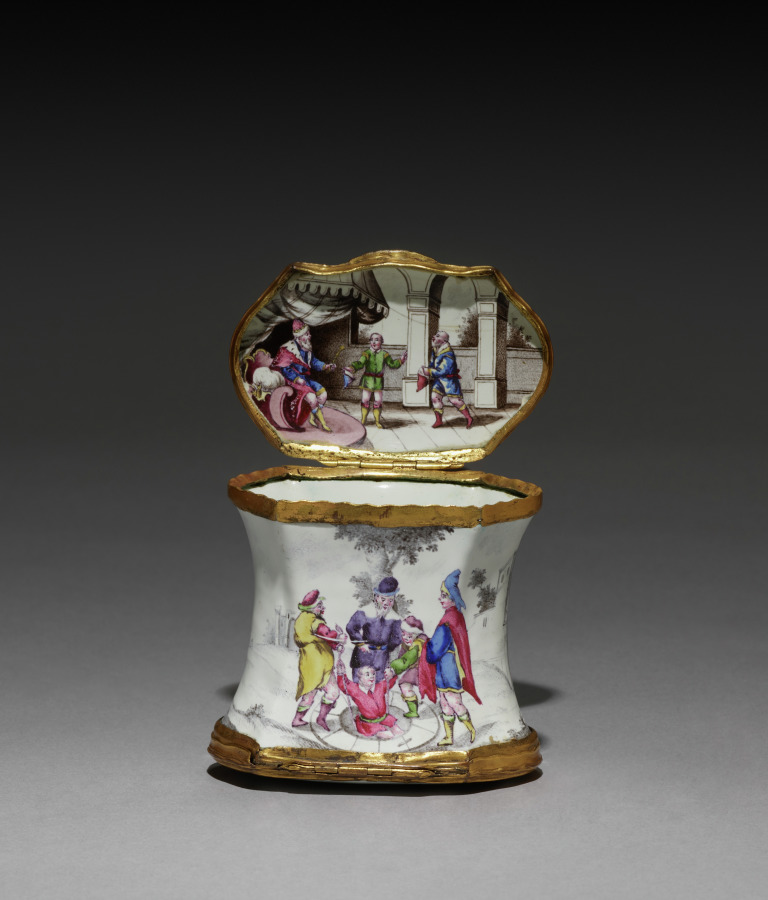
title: Box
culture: Germany, Augsburg, 18th century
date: c. 1730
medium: enamel on copper with metal mounts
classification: Miscellaneous